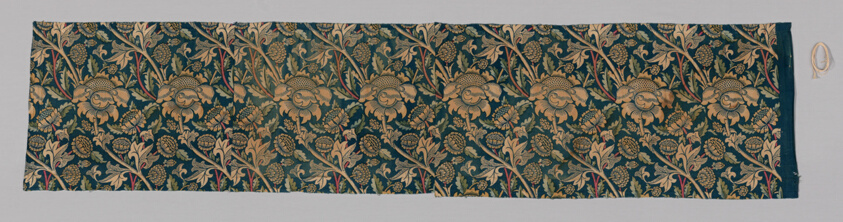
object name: Textile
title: Wey for a Valance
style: Arts and Crafts Movement, british, 19th century, 20th Century, British Arts and Crafts Movement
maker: Designed by William Morris (English, 1834–1896); Produced by Morris & Co., London (English, 1875–1940); Merton Abbey, London (English, 1881–1940)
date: Design c. 1883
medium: Cotton, plain weave; block printed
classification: textile; weaving - printed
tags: flowers, foliage, botanical